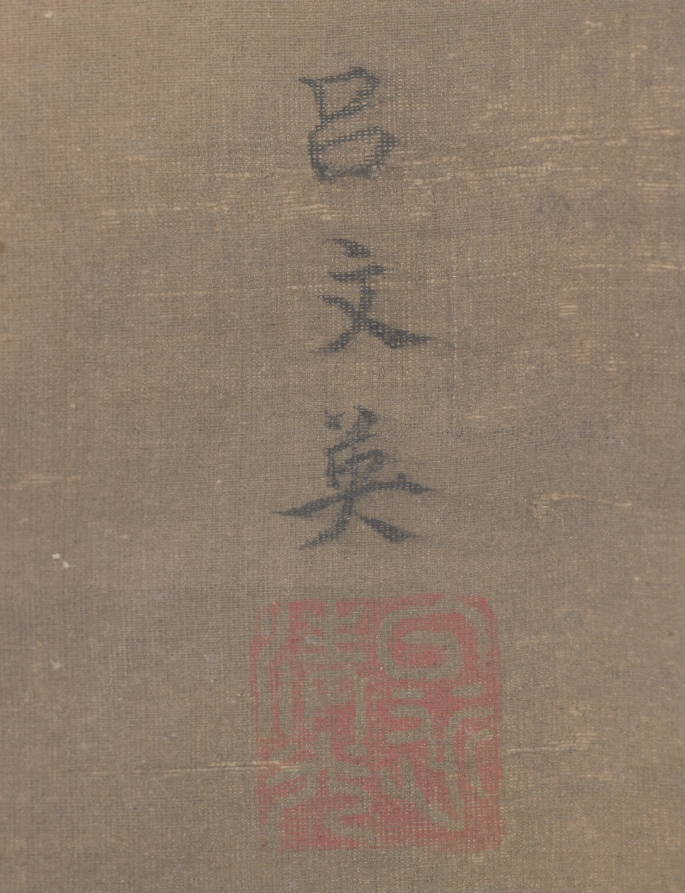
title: River Village in a Rainstorm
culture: China, Ming dynasty (1368–1644)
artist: Lu Wenying (Chinese)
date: c. 1480–1507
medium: Hanging scroll; ink and slight color on silk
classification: Painting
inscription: 呂文英 [印] 日近清光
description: In this scene, windswept rain pelting a village captures the power of nature in a masterful composition. Lü Wenying from Zhejiang served as a court painter during the Hongzhi era (1488–1505). Hardly known, with few remaining works, he is considered a Zhe school painter who followed the style of the Southern Song academy. Zhe school painters, named after the province of Zhejiang, transformed the poetic scenery of the Southern Song artists into dramatic, large-scale views. Active in the same region with frequent monsoon rains in the summer season, artists were familiar with outbreaks of rain and storms.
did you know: A young boy peeks out a window perhaps viewing the two people struggling through the rain.